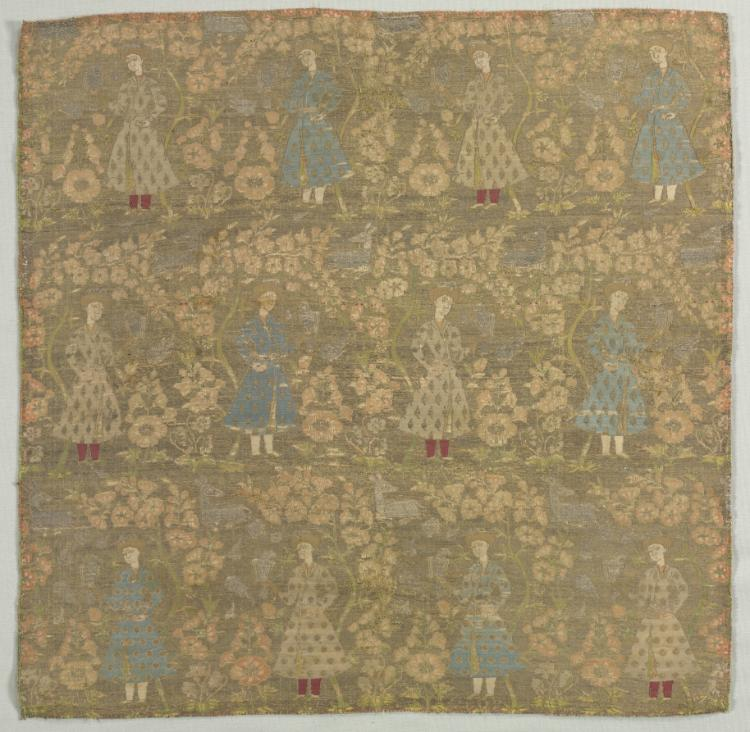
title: Section of Silk Fabric with Falconers Amid Rose Bushes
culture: Iran, Safavid period (1501–1722)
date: c. 1675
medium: Silk and silver-metal thread: twill weave with complementary and discontinuous weft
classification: Textile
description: Twill-weave fabrics were used to make garments, especially jackets, during the Safavid period. It was not until after the 1570s that Iranian textiles began to regularly feature the human figure as a decorative motif. Weavers drew from Persian paintings for their subject matter, such as the favorite princely pastime of falconing. Trained falcons were brought on royal hunts to locate and retrieve the prey; close relationships developed between the falcon and the falconer.